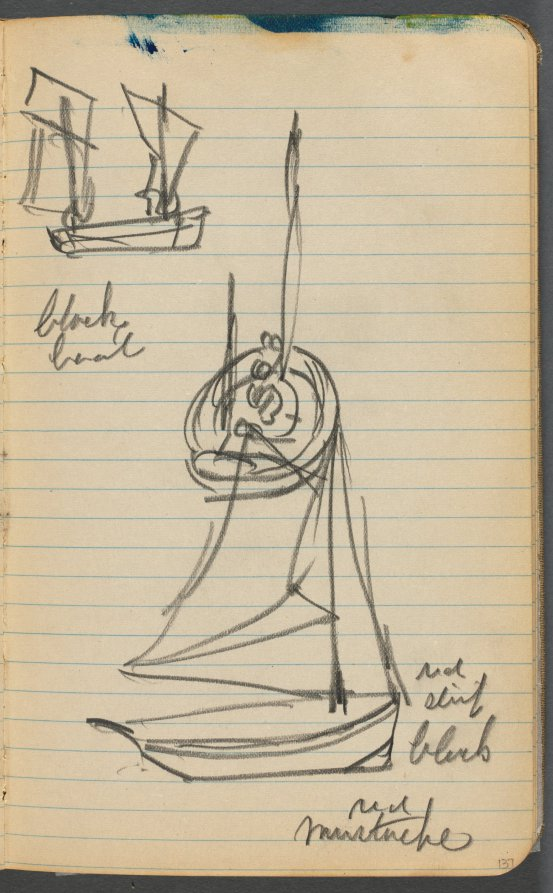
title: Sketchbook, page 137: Sailboats with notes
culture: America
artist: Maurice Prendergast (American, born Newfoundland [now Canada], 1858–1924)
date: 1905–10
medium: graphite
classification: Bound Volume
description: This sketchbook contains 69 pages of drawings, a diary largely devoted to the state of the artist's health, and a three-page discourse on the nature of genius and ideas.